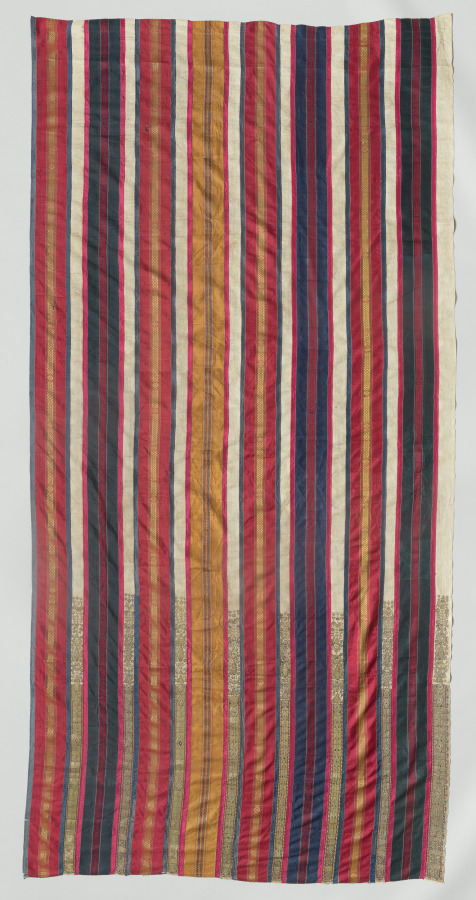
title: Curtain (one of a pair)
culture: Africa, North Africa, Tunisia, Djerba, Tunisian weaver(s) and embroiderer(s)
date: 1600s–1700s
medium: Silk, linen, metal, and dye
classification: Embroidery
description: One of a pair, this curtain displays colorful silk bands with woven geometric motifs, and cream bands with gold-embroidered plants, birds, six-pointed stars, and the khamsah (خمسة), an open five-fingered hand. Birds and the tree of life were popular good luck or fertility symbols linked to marriage. This curtain’s cosmopolitan motifs would have resonated with Jews, Muslims, and Christians alike, reflecting its creation on multiethnic and multireligious Djerba, an island off the Tunisian coast. There, both goldsmithing and gold thread embroidery were done by Jewish artisans (male and female, respectively). The fine materials suggest this curtain once hung in a wealthy home or for special occasions; interior wall hangings were typically made from rough wool.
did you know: When first acquired over a century ago, this curtain had fringe at its lower end.